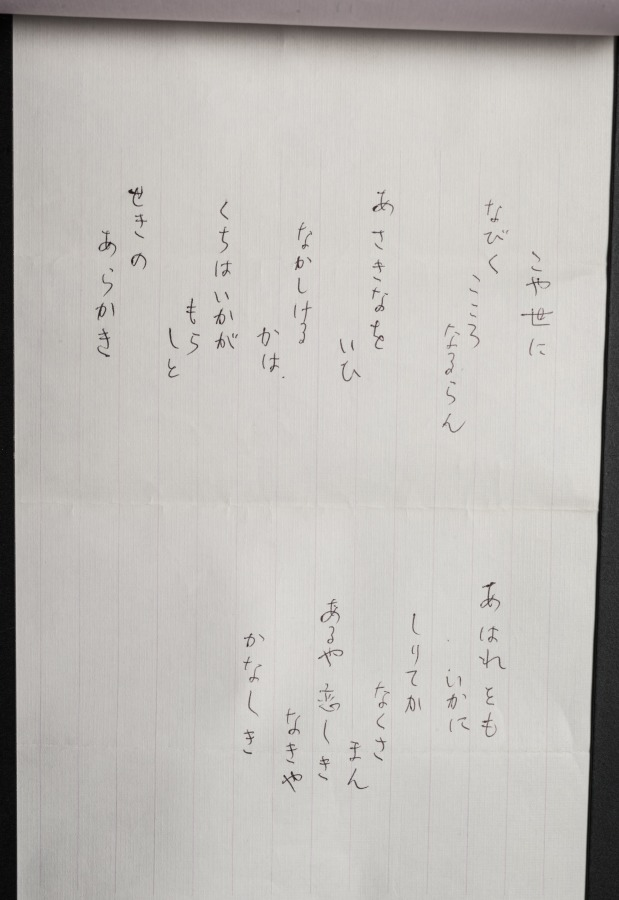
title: Section of an Illustrated Tale of Genji Poetry Contest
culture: Japan, Muromachi period (1392–1573)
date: 1400s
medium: section of a handscroll mounted as a hanging scroll; ink on paper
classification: Painting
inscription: 四十六番 左 ひげくろの大将 心さえ空にみだれし雪の［も」夜に ひとりさえつるかたしきの袖／ 四十七番 うきことを思ひさわ げばさまざまに くゆるけむりぞ いとど たち そふ／ 四十八番 すがくれてかず にも あらぬ かりのこを いづかたにかはとりかくすべき／ 右 雲井のかり かぎりとてわすれがたきを わするるも こや世に なびくこころな るらむ／ あさきなを いひ ながしける かわ ぐちは いかが もらしし せきのあらがき／ あわれをもいかに しりてか なぐさ めむ あるや 恋しき なきや かなしきに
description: This hanging scroll was once part of a handscroll depicting a waka (thirty-one syllable verse) poetry contest between characters from the 11th-century literary classic Tale of Genji. In this section, a woman known informally as Kumoi no kari, or “Goose in Fog,” after a lovelorn line she hums in the novel, is pitted against Higekuro no taishō, or “General Blackbeard.” Three of his poems, numbered 46 to 48, from “The Handsome Pillar” chapter appear over his image. The subsequent three poems inscribed above Kumoi no kari are presented as her “responses,” and come from "The Plum Tree Branch", “New Wisteria Leaves”, and "Evening Mist" chapters.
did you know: General Blackbeard laments having smelly ash poured upon him by his angry wife in one of the poems.